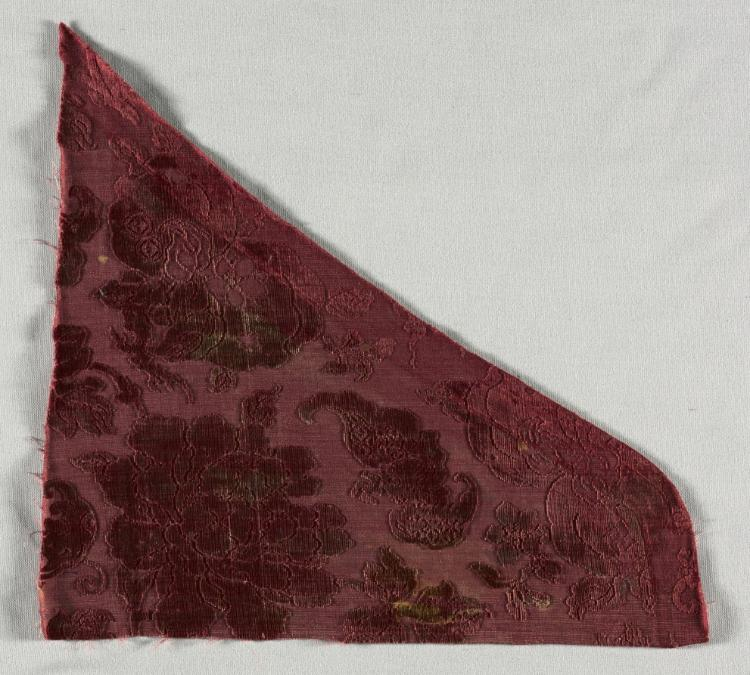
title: Silk Fragment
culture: China, Qing dynasty (1644–1911)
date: 1700s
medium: velvet (cut and voided)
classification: Velvet